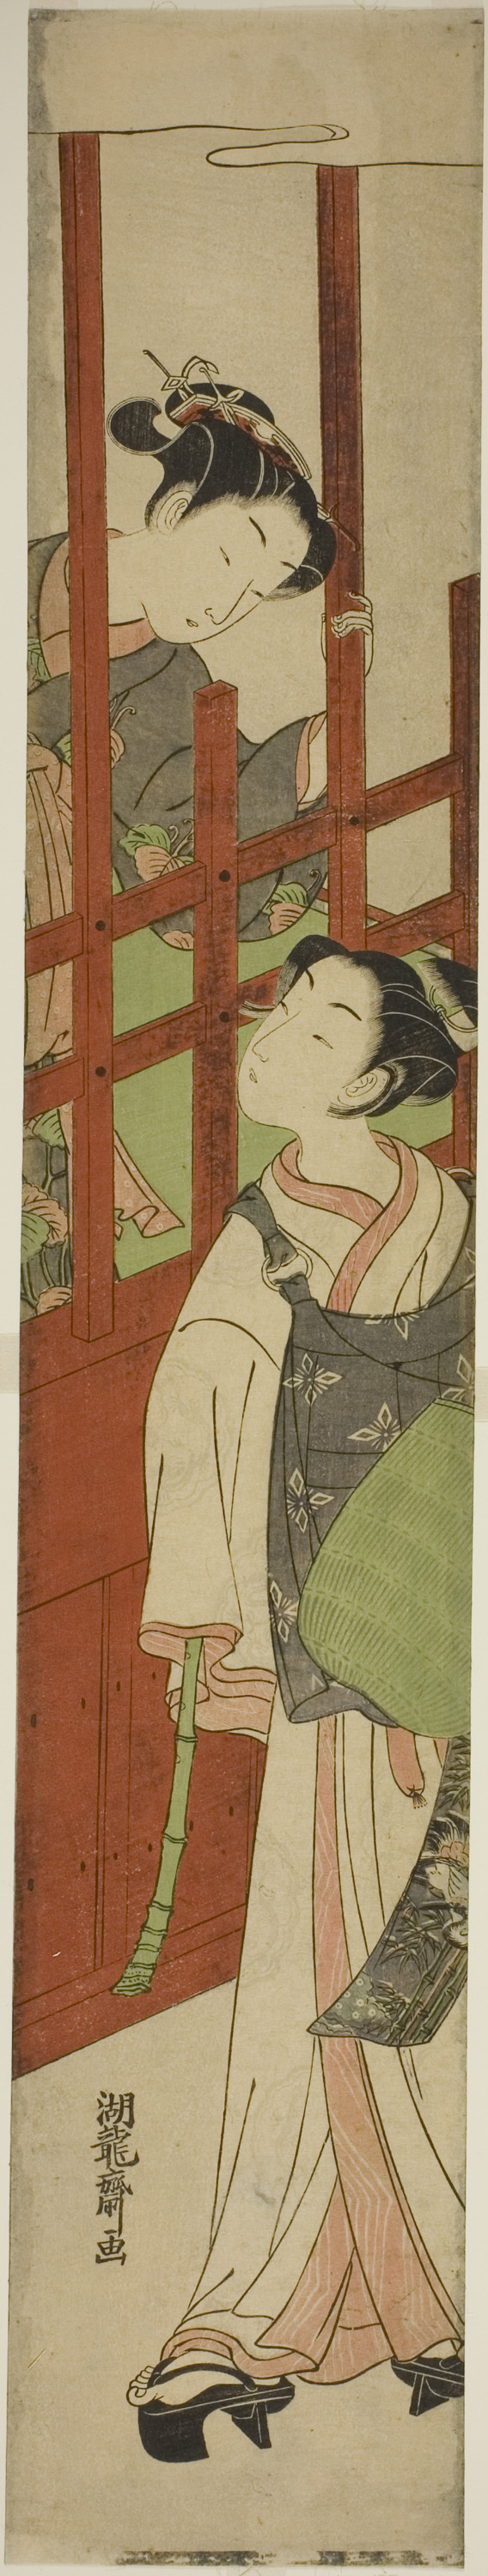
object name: Print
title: Courtesan Looks Down at Youth Dressed as Mendicant Monk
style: Japanese (culture or style)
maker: Isoda Koryusai (Japanese, 1735-1790)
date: c. early 1770s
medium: Color woodblock print; hashira-e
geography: Japan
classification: woodblock print; print; asian art